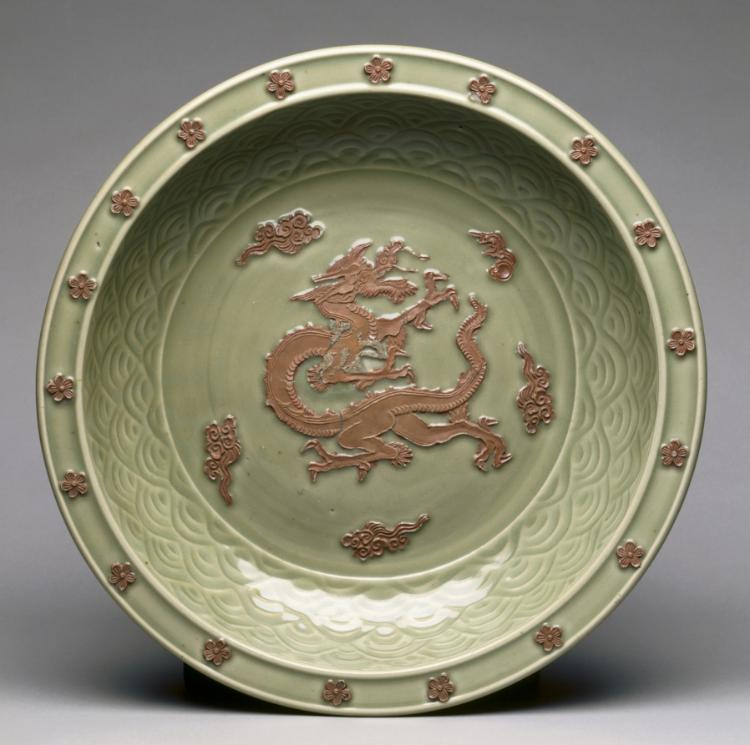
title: Plate with Relief Dragon among Clouds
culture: China, Zhejiang province, Longquan region, Yuan dynasty (1271-1368)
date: 1300s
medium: porcelaneous stoneware with celadon glaze and molded decoration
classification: Ceramic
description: In the center of this plate a majestic coiled dragon is surrounded by clouds, a wave pattern, and five-petaled rosettes around the rim. In front of the dragon's mouth is a flaming pearl, a symbol often associated with dragons from this time. The plate achieves distinctive visual contrasts with green glaze and brown, and its main decorative motifs are raised.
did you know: In front of the dragon's mouth is a flaming pearl, a symbol often associated with dragons from this time.